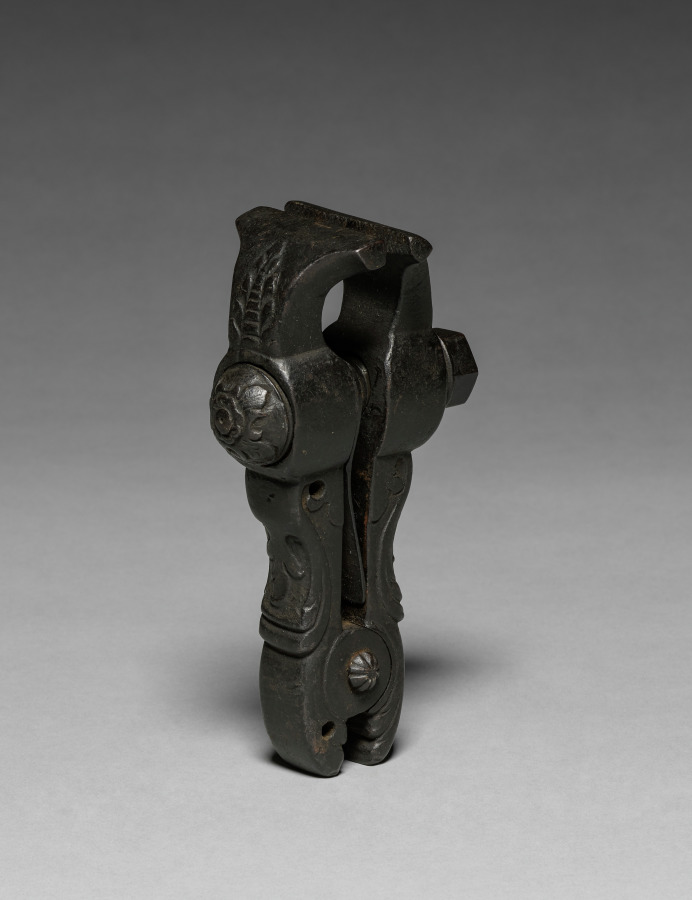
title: Hand Vice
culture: Germany (?)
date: 1600s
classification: Tool